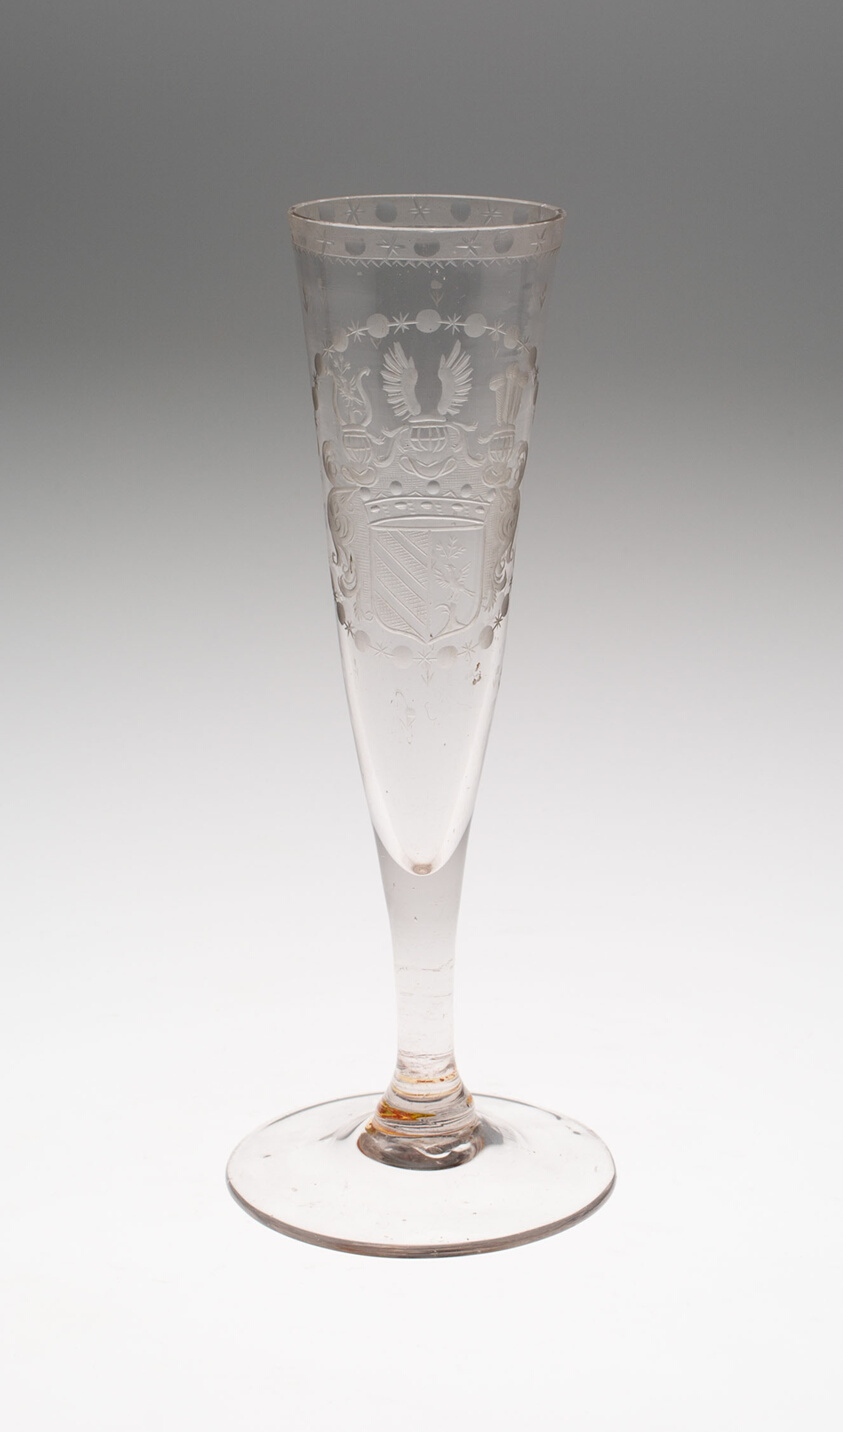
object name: Glass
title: Champagne Glass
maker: Bohemia, Czech Republic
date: c. 1800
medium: Glass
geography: Bohemia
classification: drinking vessel; glass; european decorative arts